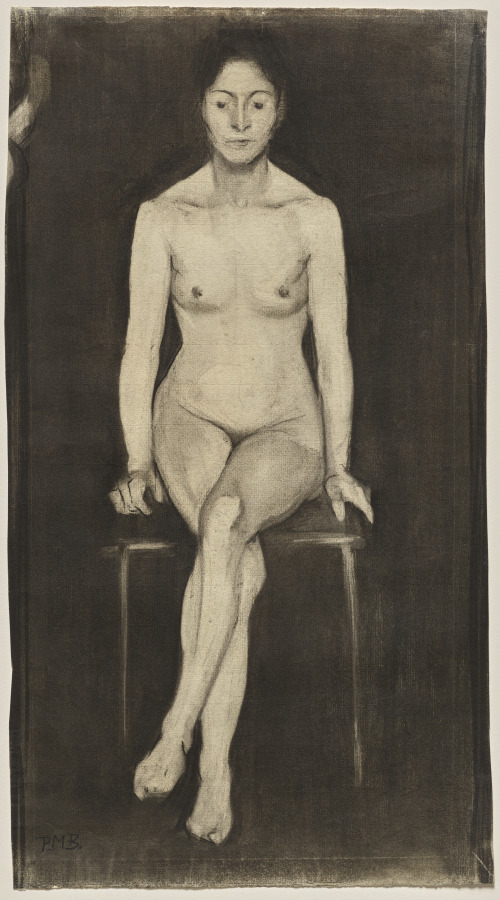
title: Seated Female Nude (Self-Portrait?)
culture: Germany, 19th century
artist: Paula Modersohn-Becker (German, 1876–1907)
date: c. 1899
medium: charcoal with stumping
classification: Drawing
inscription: signed, lower left, in black crayon: p.m.b.; verso, sale stamp, lower right, in purple-gray ink: Samml. E. Rump / [pag.?] 102 [underlined] [Nr.?] 2 [underlined] [numerals are written in black ink]; upper center, in graphite: 76 [circled]; lower left, in graphite: 75 [circled, partially erased]; lower right, in black ink: Paula Modersohn Becker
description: Although Paula Modersohn-Becker died in 1907, just as the Expressionist groups in Dresden and Munich were forming, the themes of her work prefigure the movement. This likely self-portrait exhibits her desire to convey not the idealized appearance of the female body but rather its fundamental essence, stripped of all the world’s trappings. She distilled the human body into flattened forms—achieved by erasing and blending the charcoal—and abbreviated the delineation of the feet, hands, and face. The sitter’s piercing stare invites the viewer to move beyond the body as flesh and blood toward her emotional or spiritual state.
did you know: Paula Modersohn-Becker's career was extremely brief but prolific before dying from complications of childbirth at age 31.